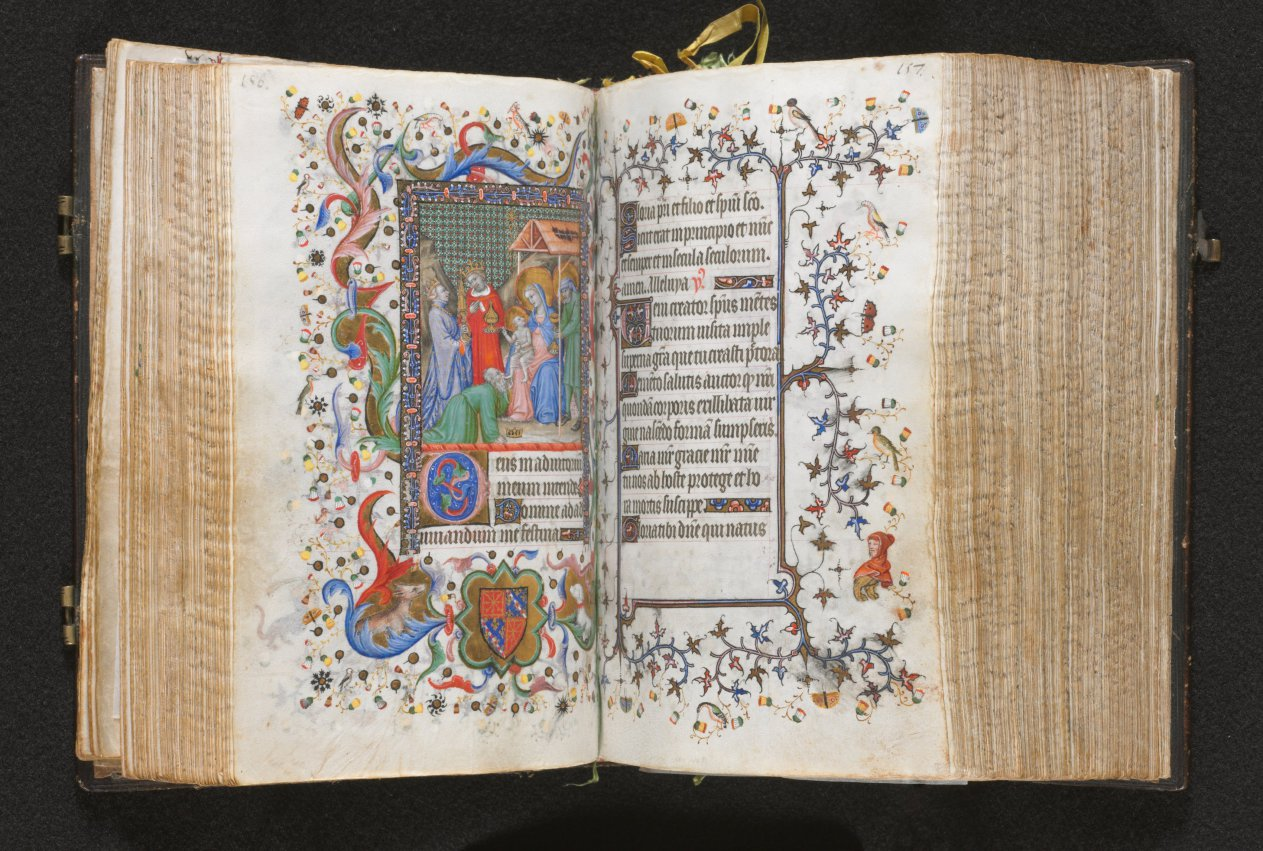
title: Hours of Charles the Noble, King of Navarre (1361-1425): fol. 79r, Text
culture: France, Paris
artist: Master of the Brussels Initials and Associates (French)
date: c. 1405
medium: ink, tempera, and gold on vellum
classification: Bound Volume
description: This precious volume was obviously highly prized by its owner, the French-born King of Navarre, who had his coat of arms painted on no less than twenty folios. Rather than directly commissioning this manuscript from a specific workshop, it seems that Charles the Noble acquired his book of hours -- perhaps ready-made for the luxury market -- while on a trip to Paris in 1404-05. A collaborative effort, six painting styles are evidenced within the pages of this codex, those of two Italians, two Frenchmen, and two Netherlanders. The painter who was responsible for the planning and decoration of the book, and who produced seventeen of the large miniatures, was a Bolognese artist known as the Master of the Brussels Initials. His principal assistant, responsible for most of the borders, was a Florentine who signed his name "Zecho" da Firenze on folio 208 verso.